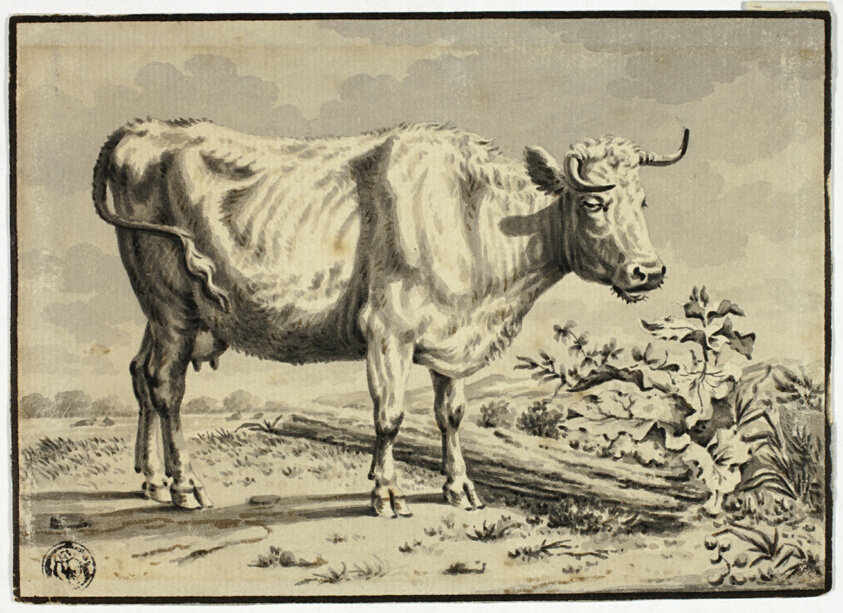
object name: Drawing and Watercolor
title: Cow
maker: Possibly after Karel Dujardin; Dutch, c. 1622-1678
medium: Brush and gray ink, with wash, over traces of graphite, on cream laid paper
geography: Holland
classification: pen and ink drawings; drawings (visual works); prints and drawing